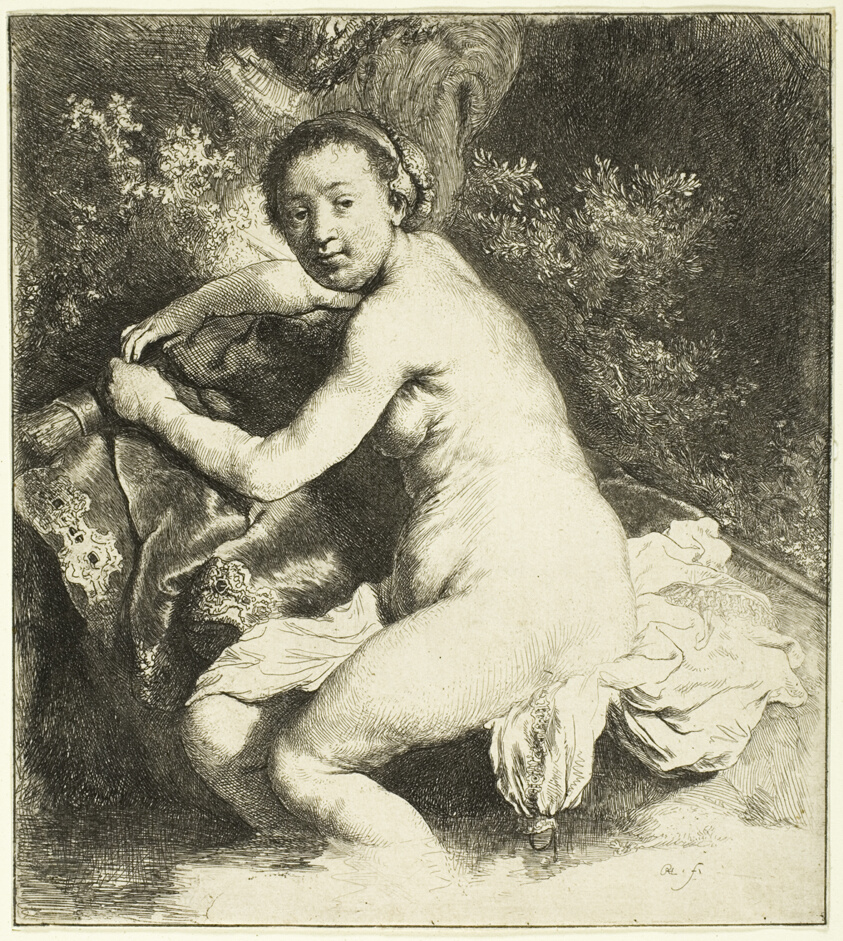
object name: Print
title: Diana at the Bath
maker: Rembrandt van Rijn (Dutch, 1606-1669)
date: c. 1631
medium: Etching on off-white laid paper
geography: Holland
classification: etching; print; prints and drawing; paper